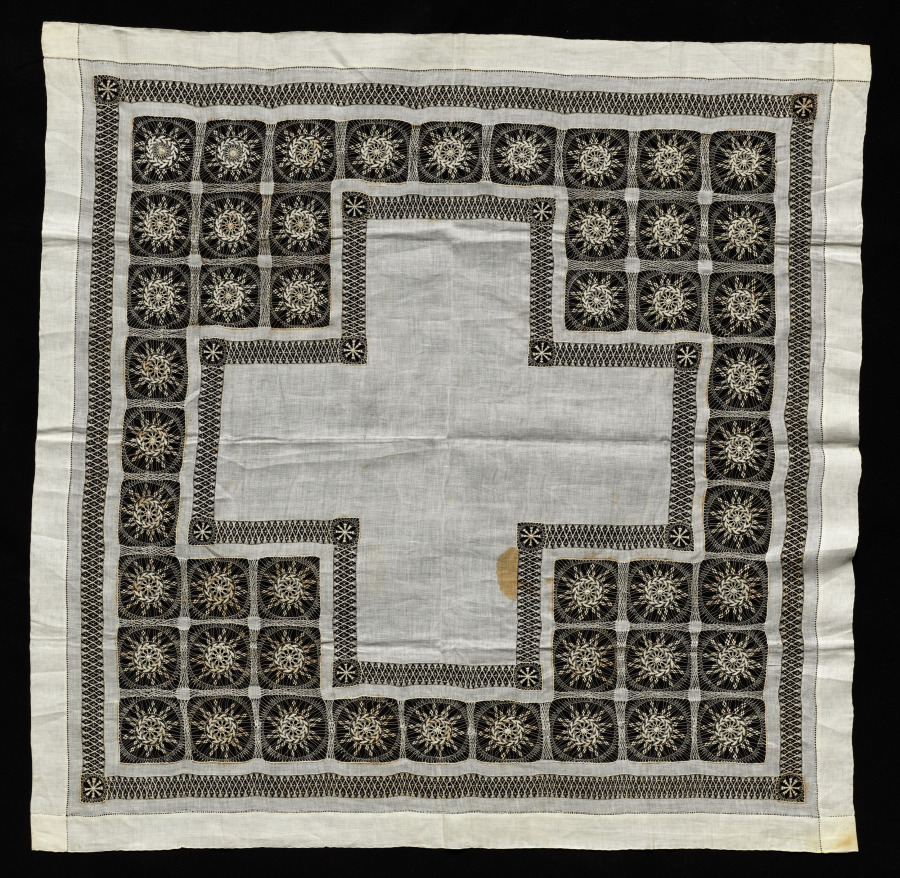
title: Lace Square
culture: Mexico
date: 1800s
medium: Linen: needle lace (drawnwork), embroidery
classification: Lace